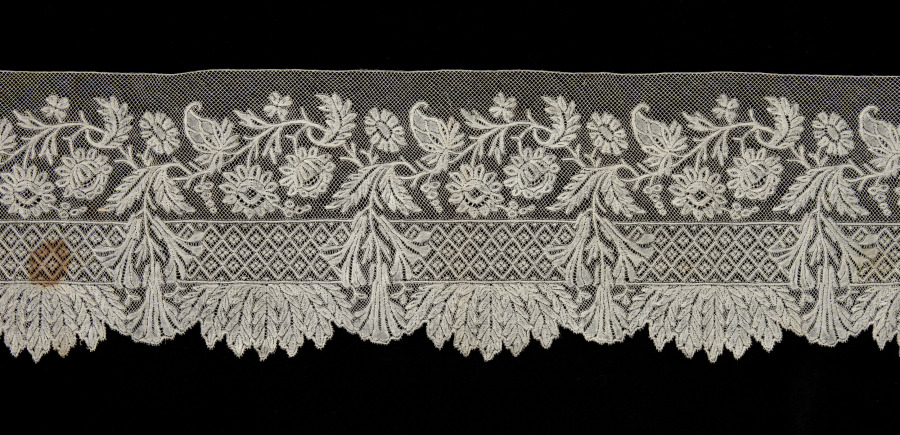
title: Lace Edging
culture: France, Valenciennes or Flanders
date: 1900–1935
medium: Linen: bobbin lace (Valenciennes)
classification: Lace